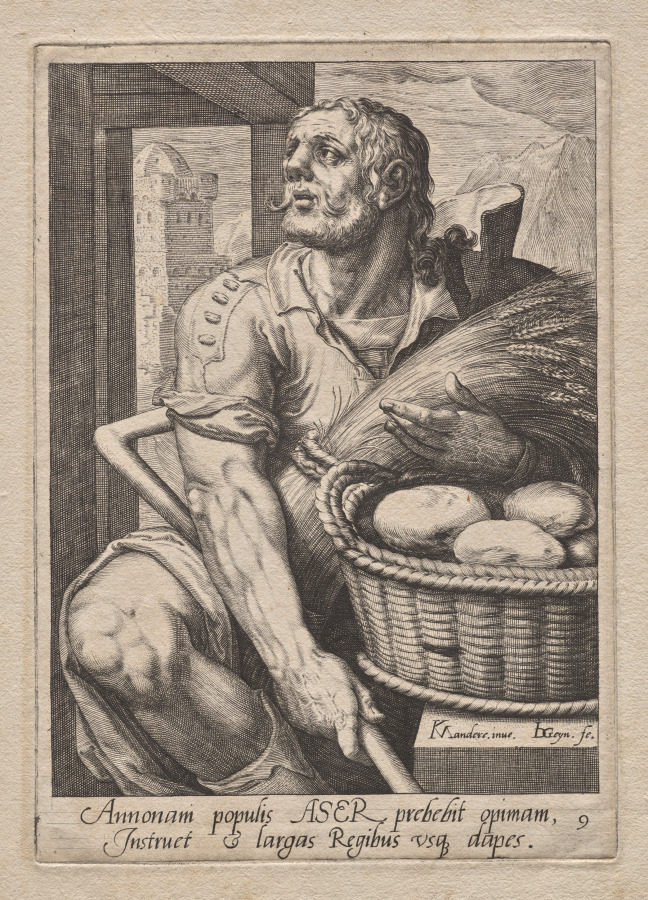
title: Plate 9: Asher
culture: Netherlands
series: The Twelve Sons of Jacob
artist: Jacob de Gheyn II (Netherlandish, 1565–1629)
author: after Karel I van Mander (Netherlandish, 1548–1606)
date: c. 1589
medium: engraving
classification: Print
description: In this print, the biblical figure Asher holds a basket of potatoes and sheaf of wheat, denoting the rich soil and abundant food produced by his tribe. This is one of a series of prints depicting the twelve sons of Jacob, each with an attribute and costume that denotes his character. According to the Old Testament, Jacob blessed each of his twelve sons, prophesizing the destiny of their tribe, and assigning them a parcel of land in Canaan. The print series was made in the Netherlands in the late 16th century, a time of political struggle when Old Testament heroes were popular exemplars of fortitude and patience.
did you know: The castle in the background of this image of Asher, son of Jacob, suggests that food he prepares will be served to kings, as prophesized by his father.